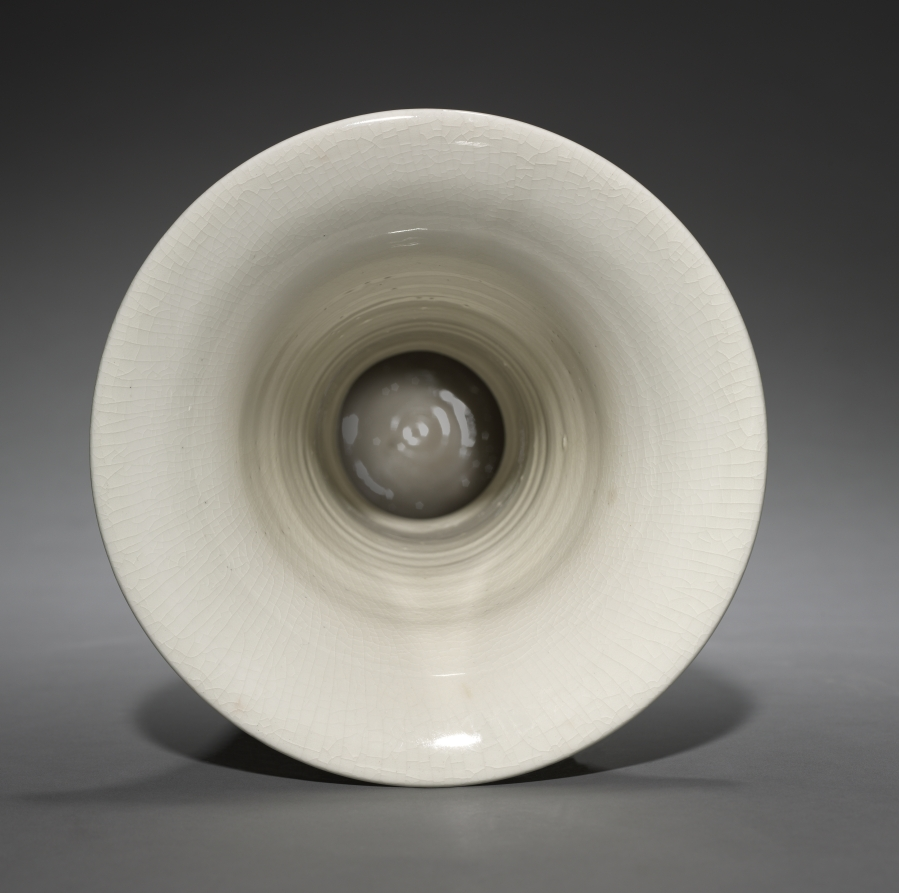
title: Beaker Vase: Zun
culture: China, Qing dynasty (1644-1911), Kangxi reign (1661-1722)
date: 1661–1722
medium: porcelain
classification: Ceramic